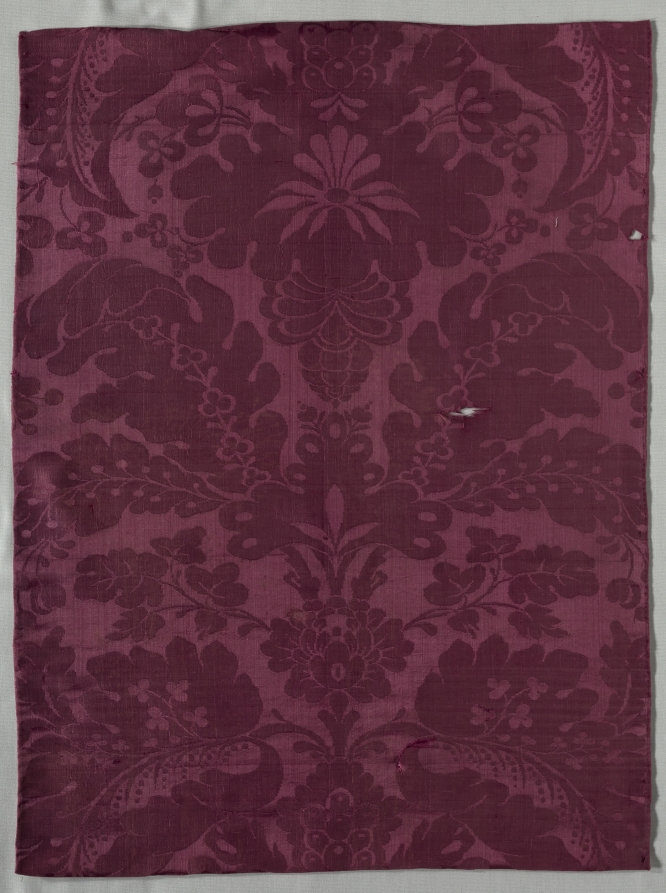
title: Length of Silk Damask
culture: Italy, late 17th-18th century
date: late 1600s-early 1700s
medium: damask, silk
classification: Textile